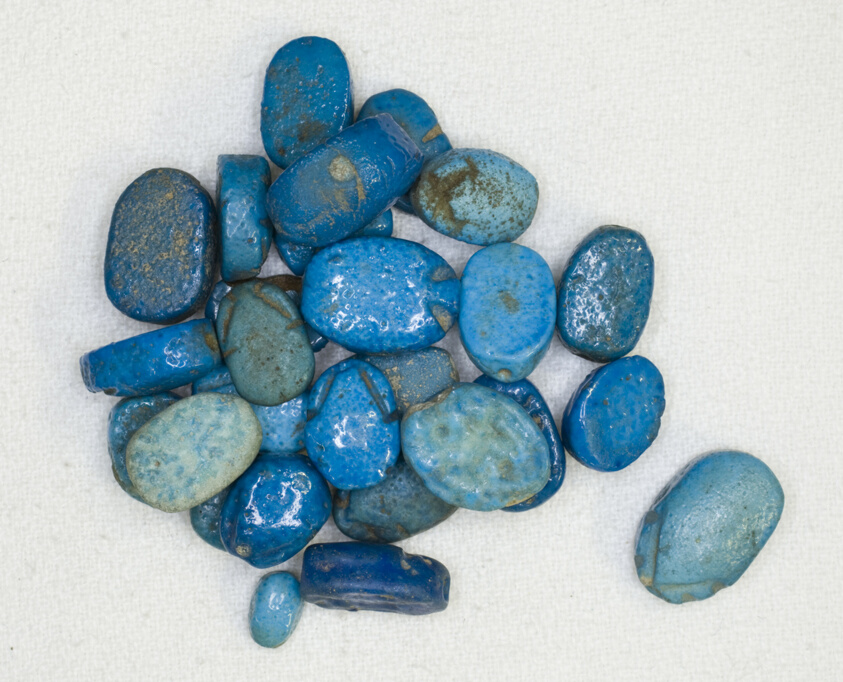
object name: Costume and Accessories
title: Scarabs with Plain Base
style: egyptian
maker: Egyptian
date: First Intermediate Period, Dynasties 9–11 (about 2160–2055 BCE)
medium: Faience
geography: Egypt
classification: unidentified; bead; ancient art; costume; faïence (composite material)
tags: scarab beetle